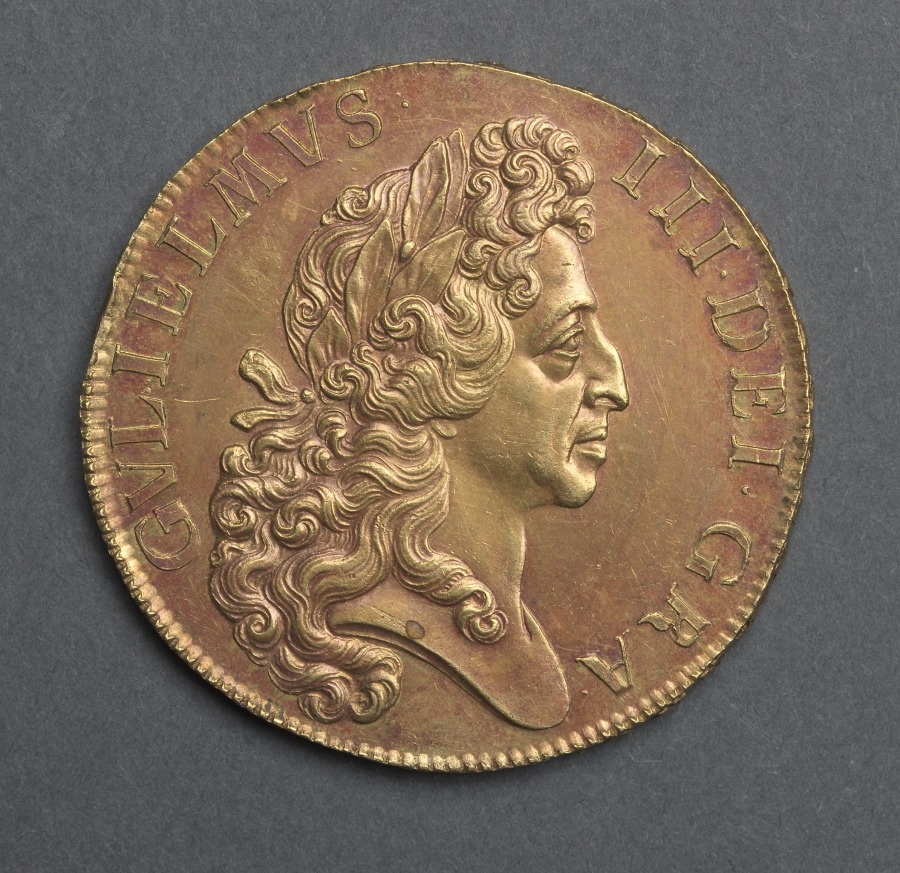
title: Five Guineas: William III (obverse); Four Shields and Lion of Nassau (reverse)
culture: England, William III, 1694-1702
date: 1701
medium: gold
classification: Coins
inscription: GVLIELMVS . III . DEI . GRA.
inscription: MAG BR∙ FRA ET∙ HIB REX∙ 1701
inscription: DECUS ET TUTAMEN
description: There were three types used on the five guinea coin of William III, who continued to reign long after the death of Mary. As hammered coinage was still in circulation along with the mill coins, the government decided to call in all the remaining hammered pieces in 1695, completing the reform of the coinage. This affected mostly the silver coinage. Gold was gradually reduced until the value of the guinea, when set against the silver coinage, was 21 shillings and 6 pence. The guinea finally settled at 21 shillings.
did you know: Of the coinage minted by William III, this type is considered the finest because of the profusion of detail.